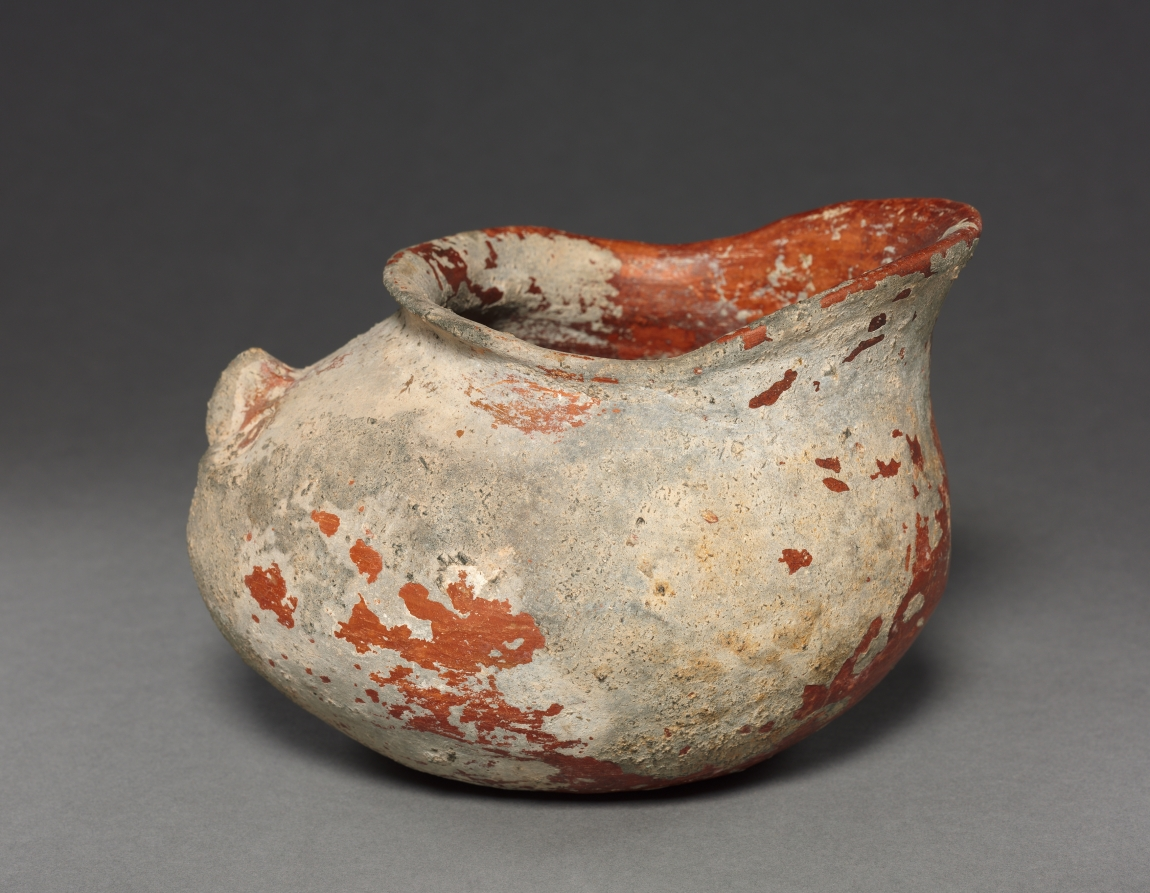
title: Head Effigy Bowl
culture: Mexico, Region of Tilantongo, District of Tlaxiaco, Nayarit style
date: 100 BCE–300 CE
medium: pottery with burnished red slip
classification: Ceramic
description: After about 200 BC, West Mexican chieftains gained in authority, their new status reflected in shaft tombs that shelter not only their remains but also lavish offerings, including sculptural ceramics. Many of the ceramics may refer to the crucial activities of a chief’s life, such as marriage, feasting, and war. The meaning of this unusual bowl—a head whose gaping mouth serves as the aperture—is unknown.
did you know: Diego Rivera and Rufino Tamayo were avid collectors of ancient Nayarit art.